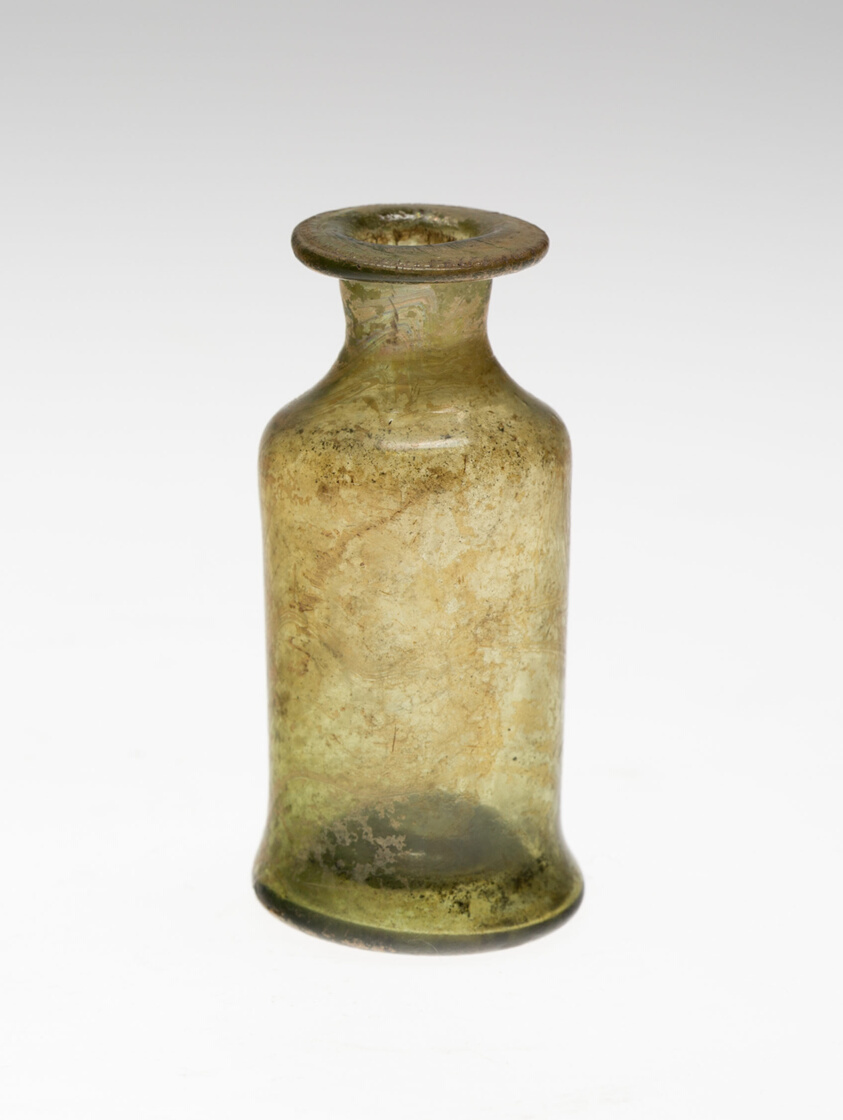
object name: Glass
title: Bottle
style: late medieval, medieval, european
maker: Germany, Cologne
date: Late Medieval Period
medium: Glass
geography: Cologne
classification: glass; european decorative arts